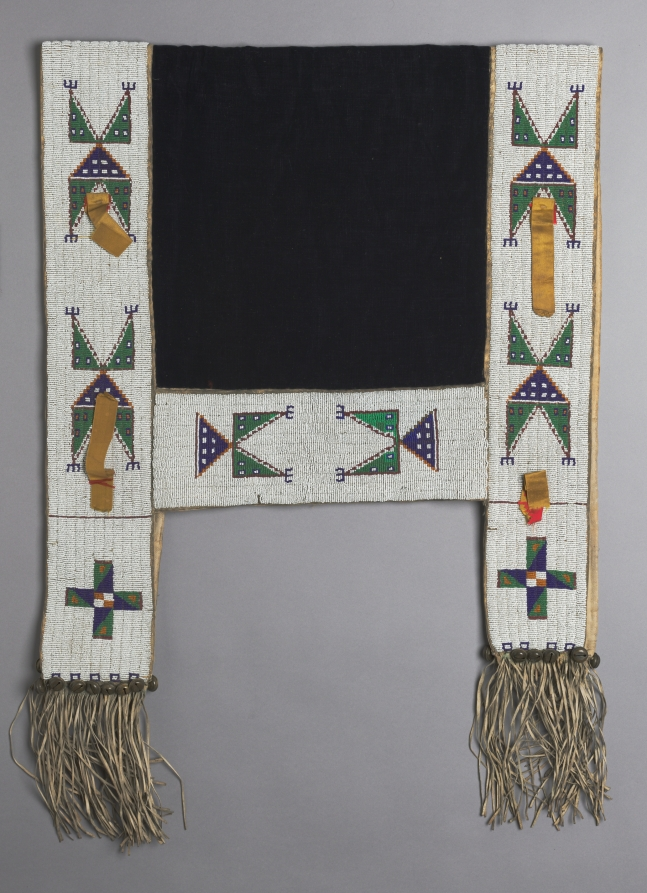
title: Saddle Blanket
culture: America, Native North American, Plains, Dakota, Lakota(Sioux), 19th century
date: third quarter of 19th century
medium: velvet, leather, beads, silk, metal, sinew sewn, paha stitch; white cotton lining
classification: Textile